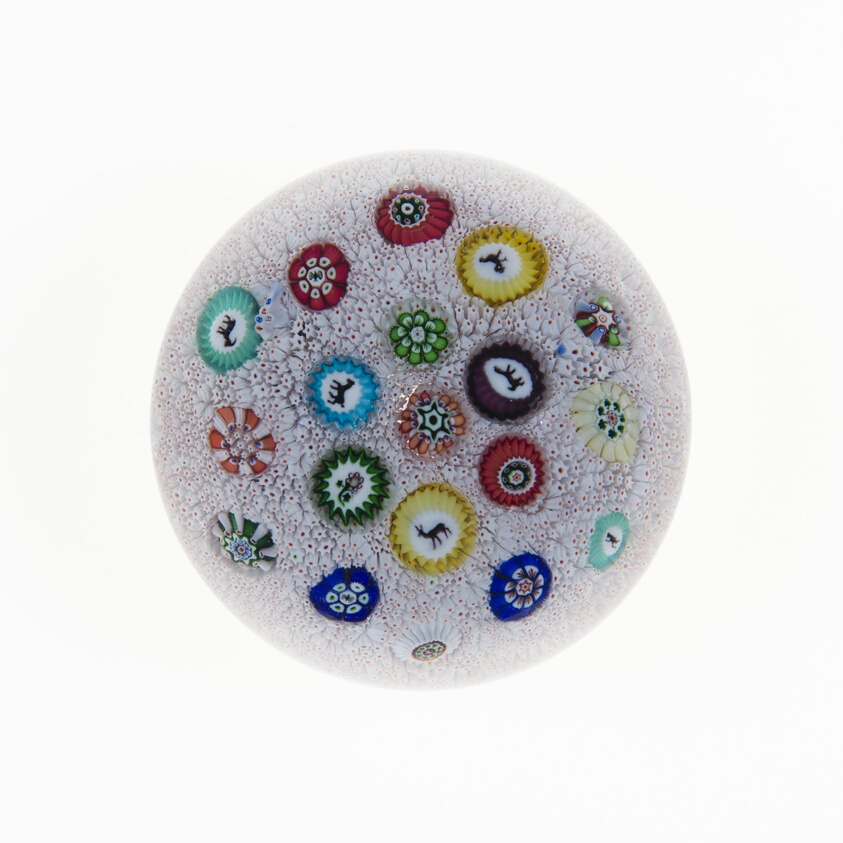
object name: Glass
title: Paperweight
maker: Baccarat Glassworks (Cristalleries de Baccarat); Lorraine, France, founded 1764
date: 19th century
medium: Glass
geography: Lunéville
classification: paperweight; millefiori; european decorative arts; glass